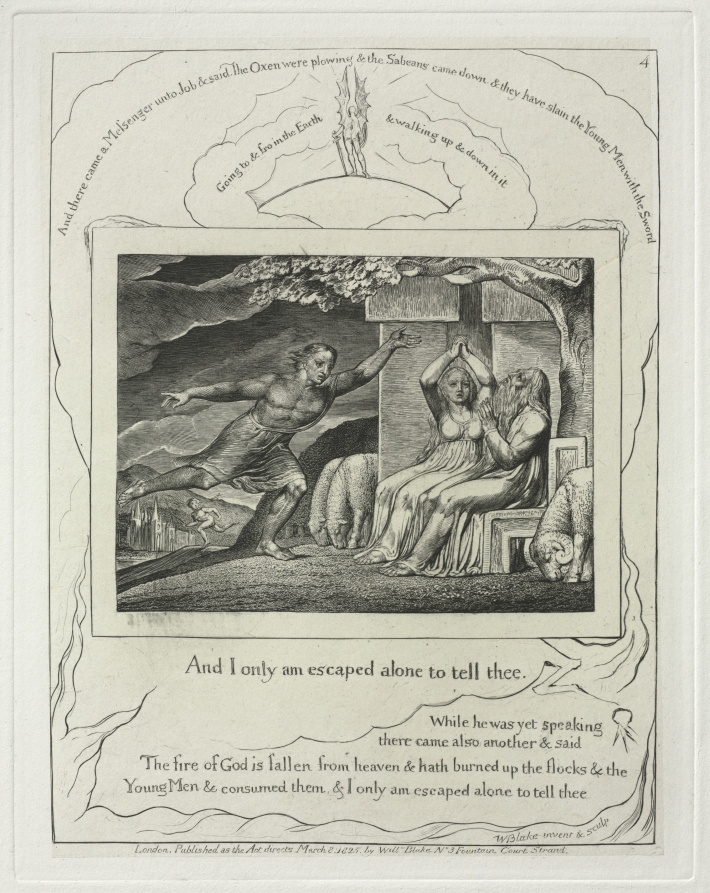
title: The Book of Job: Pl. 4, and I only am escaped alone to tell thee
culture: England, 19th century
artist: William Blake (British, 1757–1827)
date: 1825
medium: engraving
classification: Print